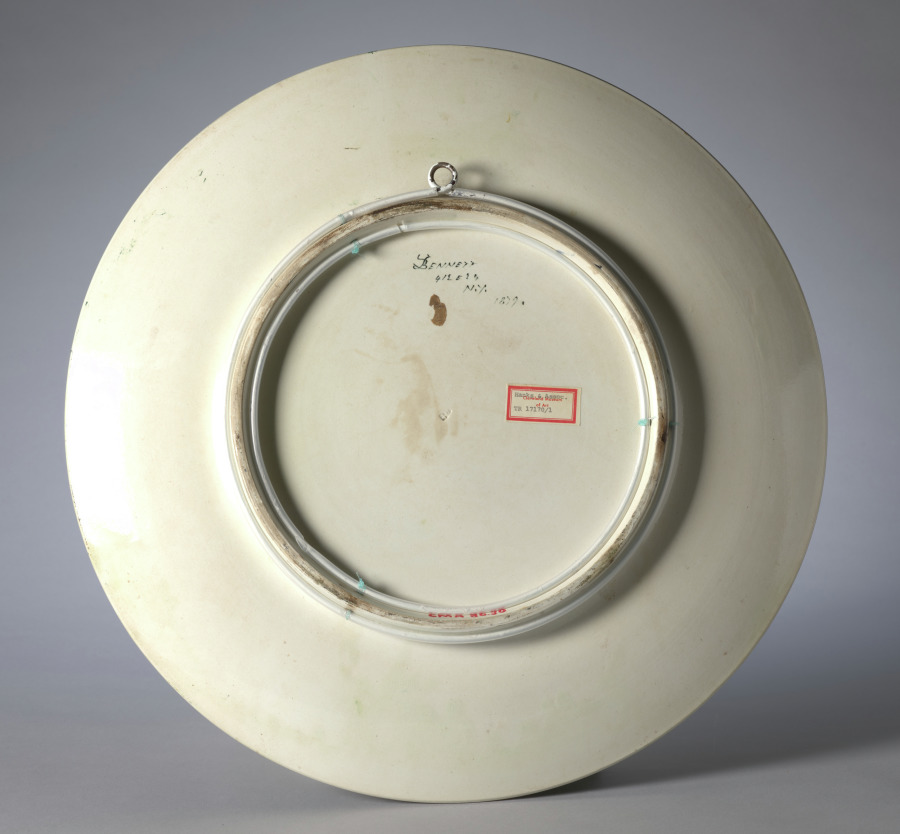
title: Plaque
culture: America, New York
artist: John Bennett (American, 1840–1907)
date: 1879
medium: earthenware with underglaze painted decoration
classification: Ceramic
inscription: inscription in black on bottom: "JB [in monogram] ENNETT/ 412 E 24/ N.Y./ 1879."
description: John Bennett was trained in England. He seems to have played a crucial role there by introducing painted decoration on ceramics at the Doulton factory in the early 1870s. Although they admired his talent, his English colleagues found Bennett had a difficult personality, and his stay at the Doulton factory was brief. By 1876 he was in New York, bringing with him the concepts of the English Aesthetic Movement: muted colors and great naturalism in the depiction of birds and flowers.